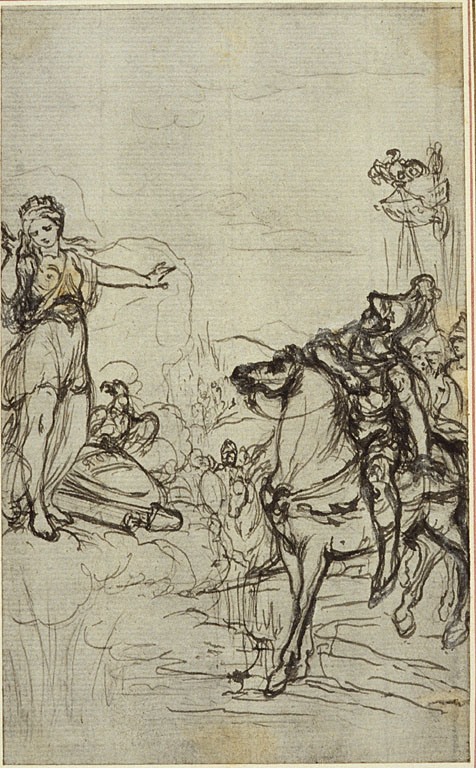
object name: Drawing and Watercolor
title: Study for Lucain's "La Pharsale", Canto I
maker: Hubert François Gravelot (French, 1699-1773)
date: c. 1766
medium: Pen and black ink, heightened with white chalk, on gray laid paper, incised for transfer and perimeter mounted on ivory laid paper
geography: France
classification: pen and ink drawings; drawings (visual works); prints and drawing